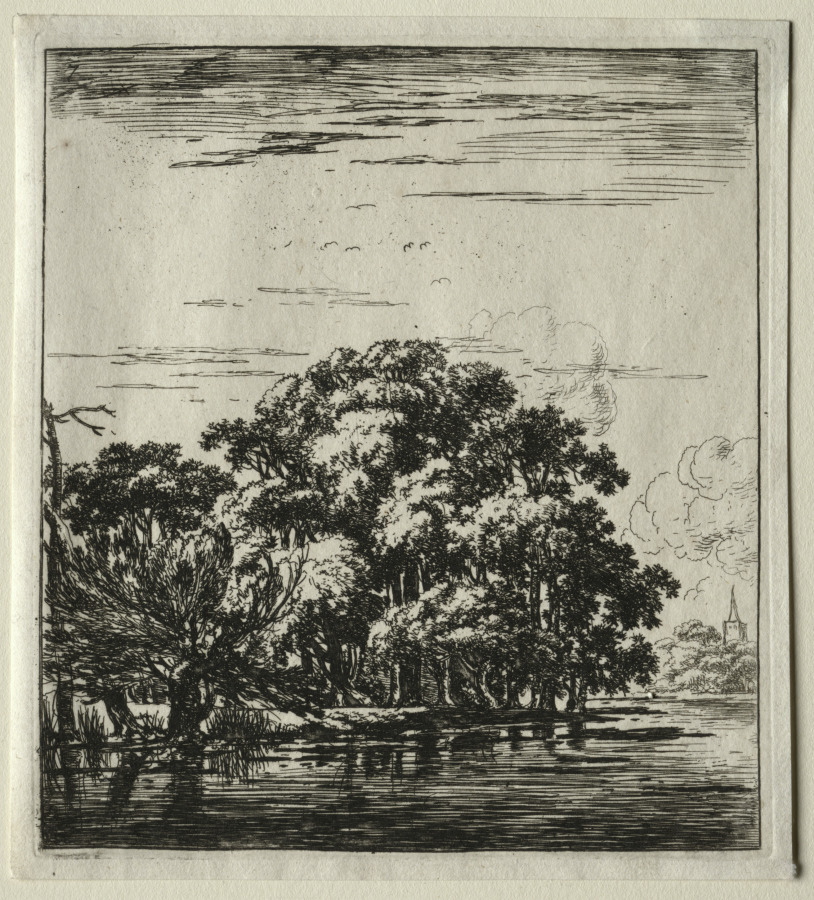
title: Le bois au bord de la rivière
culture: Flanders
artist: Herman Naiwincx (Flemish, c. 1624–after 1651)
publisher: Clement de Jonghe (Dutch, 1579–1679)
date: 1640–51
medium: engraving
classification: Print